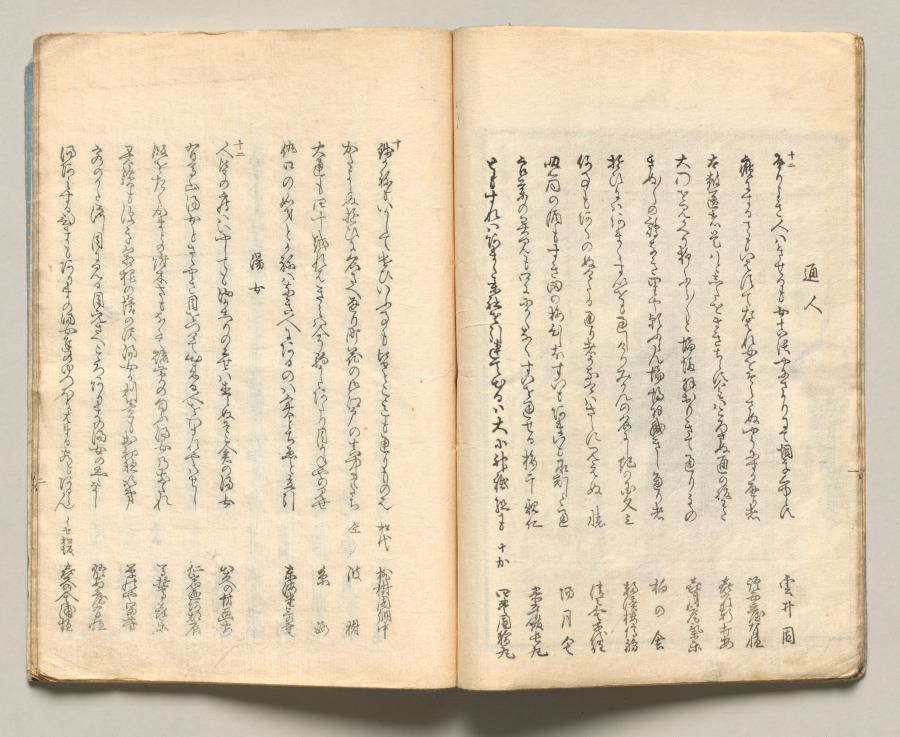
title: Spread Nine from Volume Six of People of Japan in Light Verse (Kyōka)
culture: Japan, Edo period (1615–1868)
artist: Utagawa Hiroshige (Japanese, 1797–1858)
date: 1857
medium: Woodblock-printed book; ink and color on paper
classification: Bound Volume